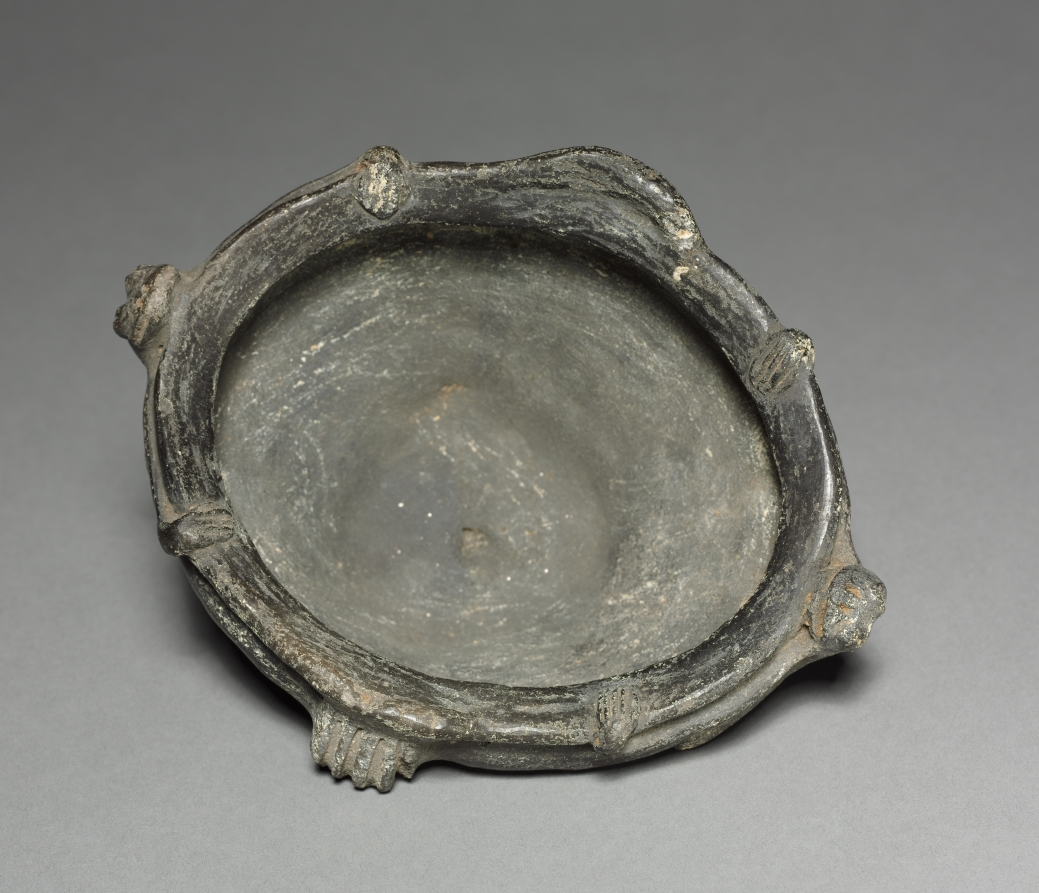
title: Bowl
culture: Colombia, 19th-20th century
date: before 1921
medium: black ware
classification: Ceramic